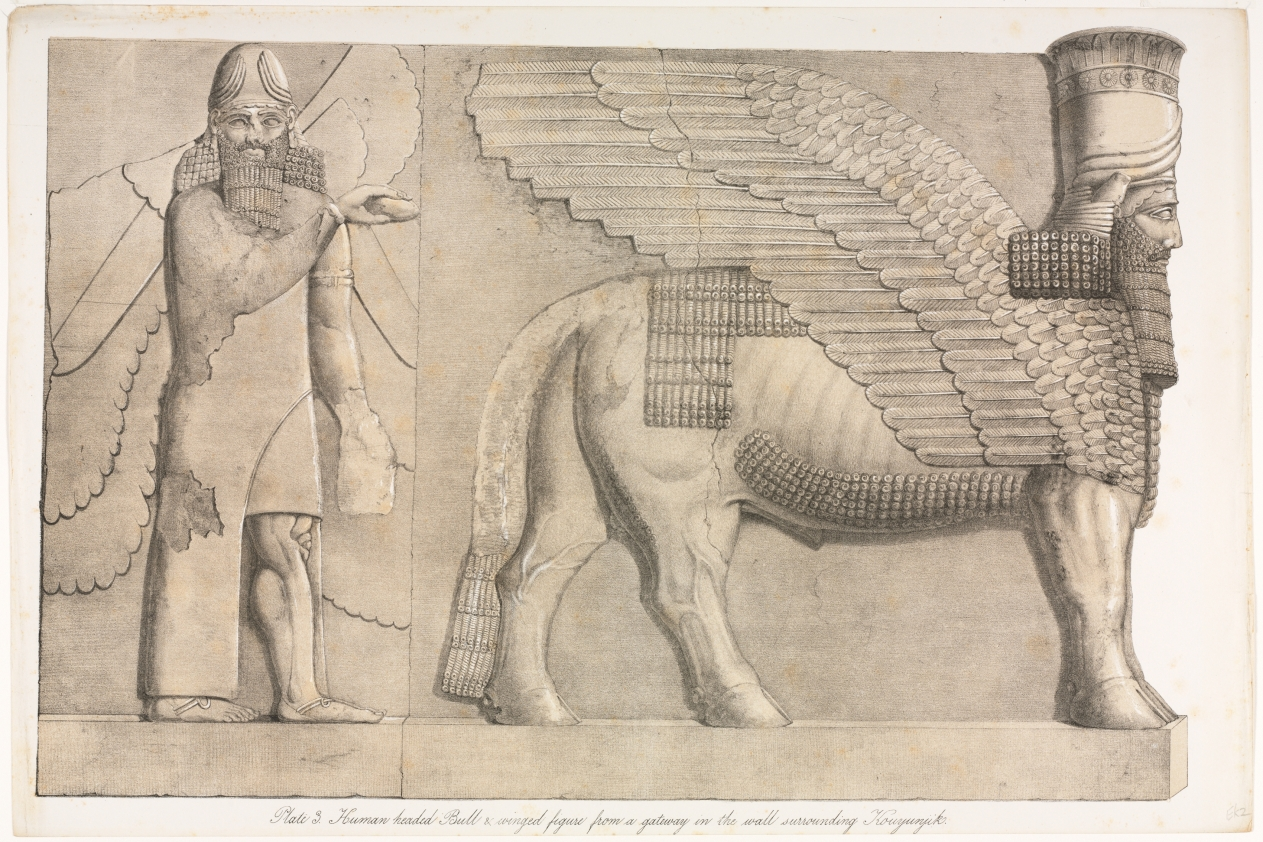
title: Monuments of Ninevah: Plate 3, Human-headed Bull and Winged Figure from a Gateway in the Wall Surrounding Kouyunjik (Quyunjik)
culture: England, 19th century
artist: Austen Henry Layard (British, 1817–1894)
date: 1853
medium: lithograph in black and beige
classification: Print